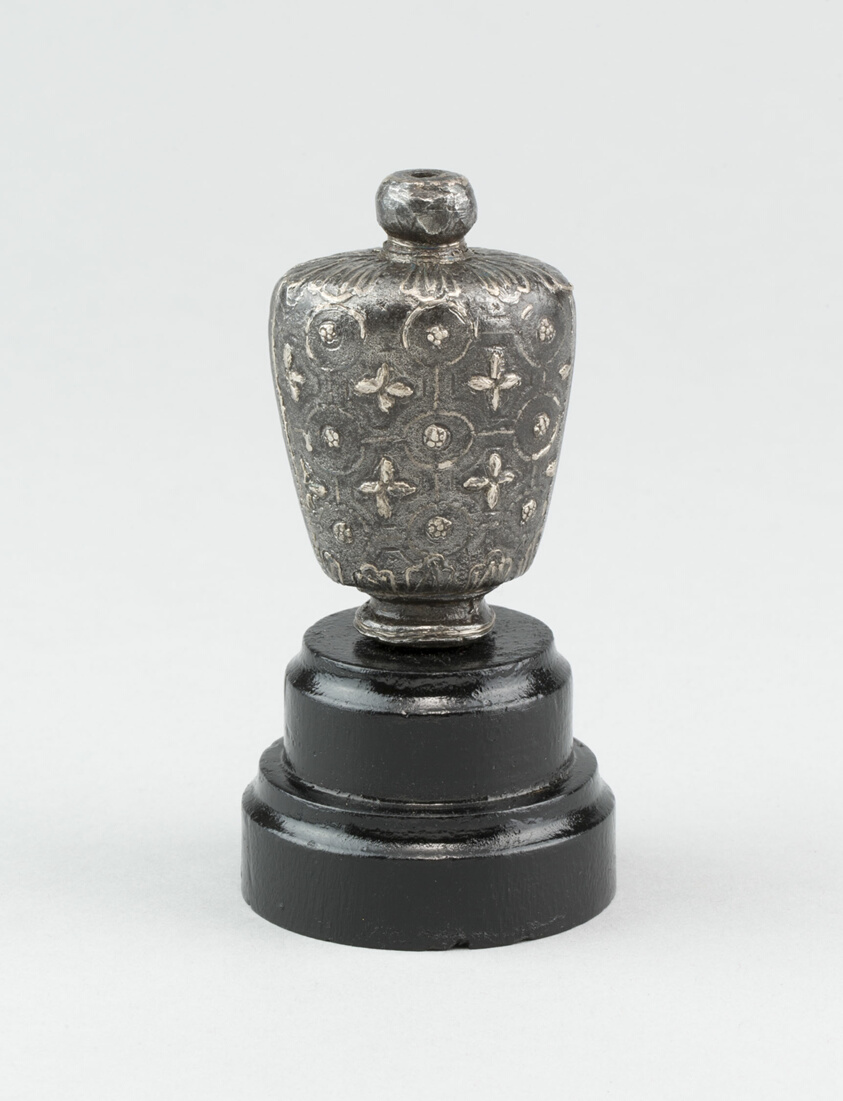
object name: Arms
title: Sword Pommel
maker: European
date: 19th century in early 17th century style, possibly 17th century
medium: Iron and silver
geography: Europe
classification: edged weapon-sword; arms; arms and armor